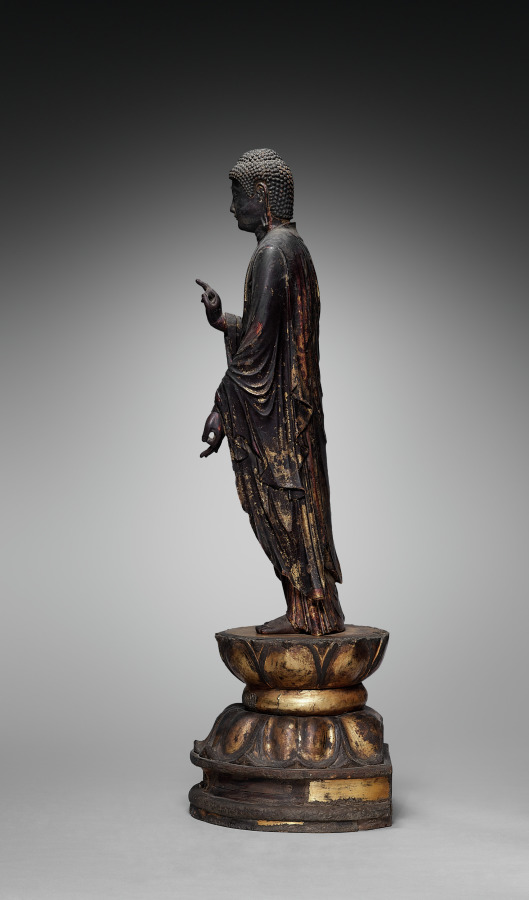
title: Amida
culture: Japan, Kamakura period (1185–1333)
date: 1200s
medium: Wood with lacquer and gilding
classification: Sculpture